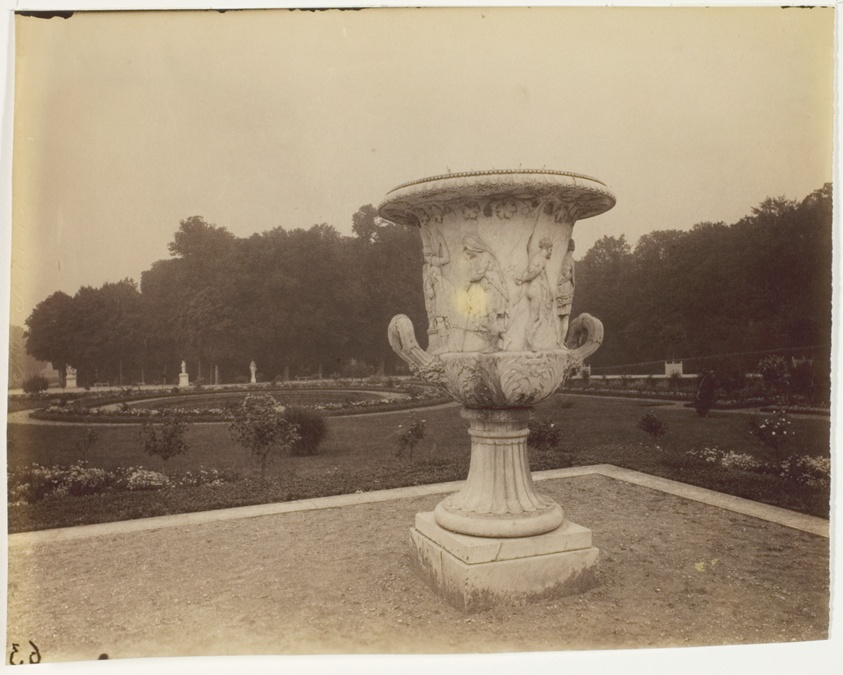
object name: Photograph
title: Versailles, Vase par Cornu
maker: Jean-Eugène-Auguste Atget (French, 1857–1927)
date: 1902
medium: Albumen print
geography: France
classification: albumen silver print; photographic process; photography; photograph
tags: Collected by Hugh Edwards